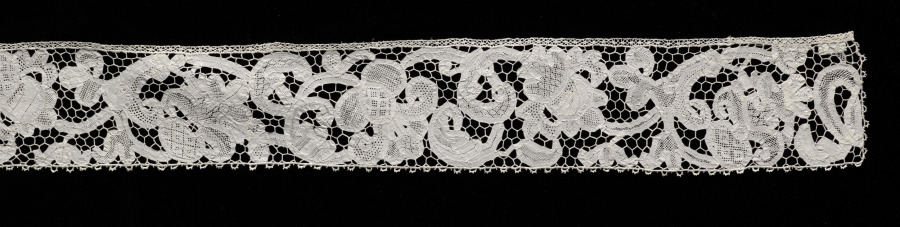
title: Lace Edging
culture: Italy, Genoa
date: 1700s–1800s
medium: Linen: needle lace and bobbin lace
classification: Lace